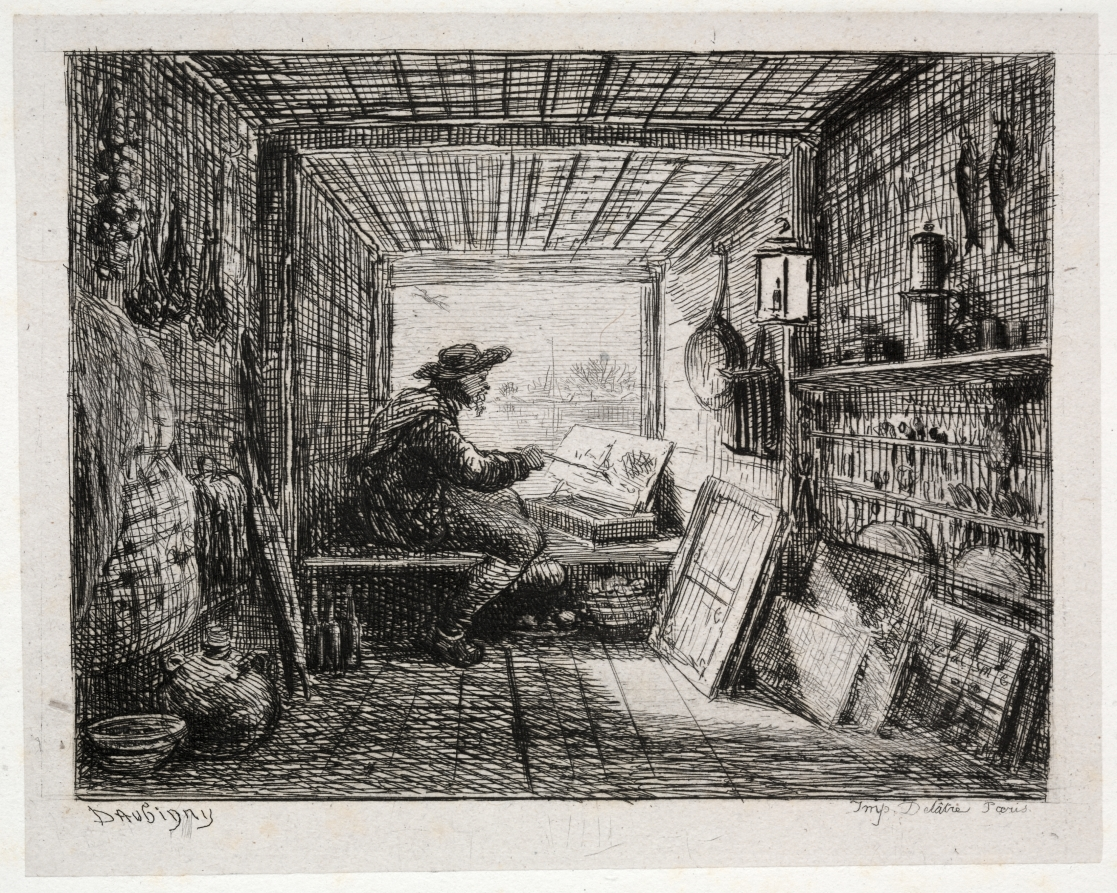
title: The Boat Trip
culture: France, 19th century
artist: Charles François Daubigny (French, 1817–1878)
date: 1861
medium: 16 etchings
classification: Portfolio